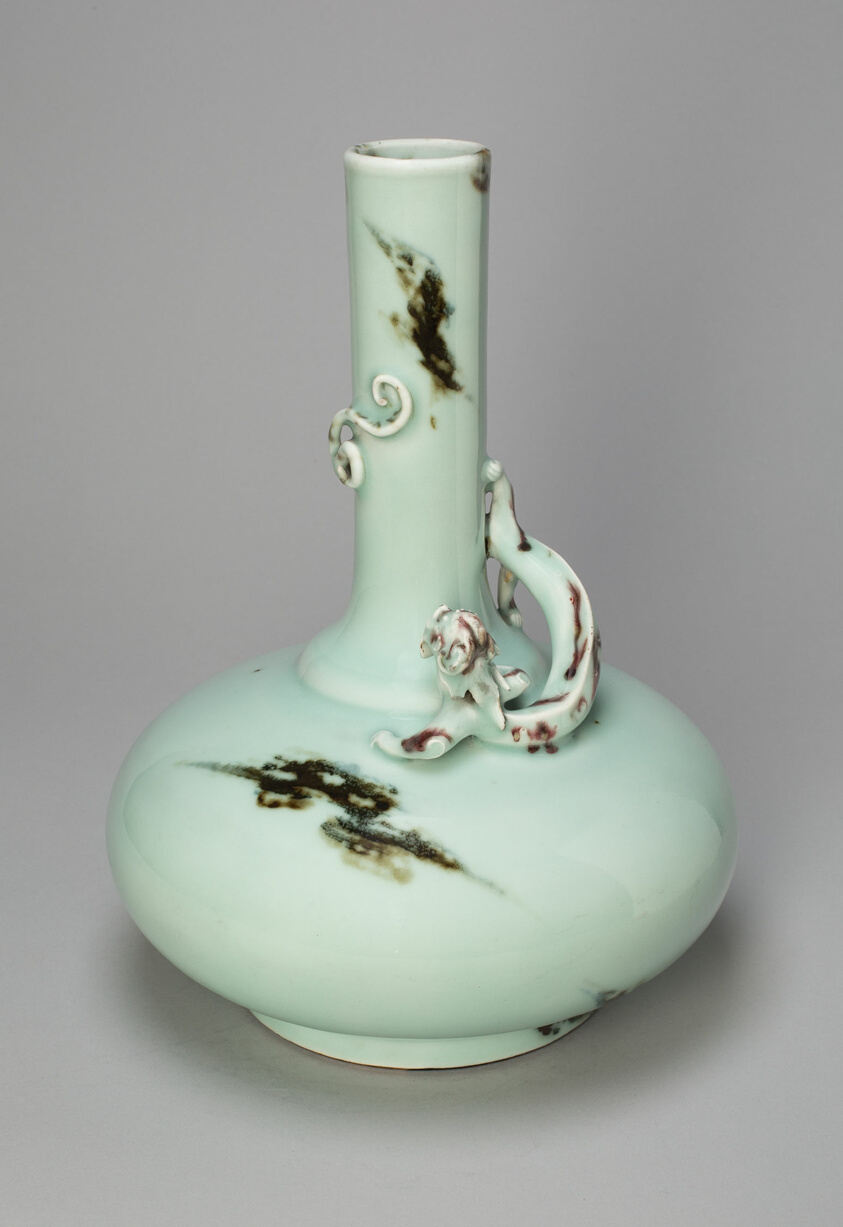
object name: Vessel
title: Long-Necked Vase with Encircling Dragon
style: Chinese (culture or style)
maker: China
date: Qing dynasty (1644–1911), Qianlong reign mark and period (1736–1795)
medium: Celadon-glazed porcelain flecked with underglaze red and iron brown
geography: China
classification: vase; porcelain; vessel; asian art; ceramics